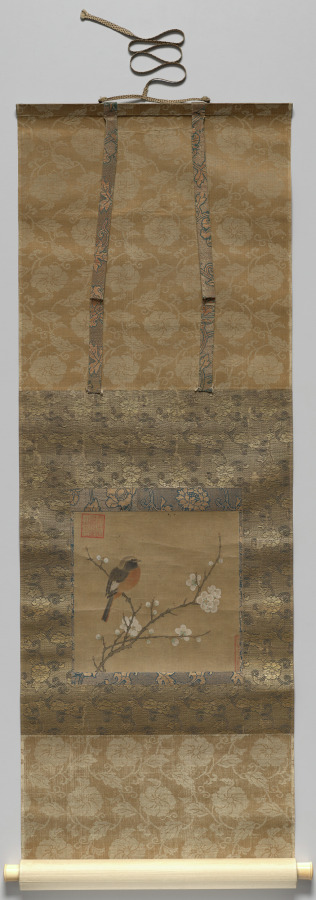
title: Bird on a Flowering Branch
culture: China, Southern Song dynasty (1127–1279)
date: 1100s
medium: album leaf mounted as a hanging scroll; ink and color on silk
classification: Painting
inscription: 2 seals: 1 official seal of the Yuan Dynasty; 1 unidentified partial seal.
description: A male redstart sits hunched on the branch of a flowering plum tree in early spring. The bird’s plumage is rendered in fine detail with a great naturalistic sense, characteristic of Southern Song court painting. While redstarts tend to spend the winter in warmer climates, they may have been seen during the mild winters in China’s southeast in Hangzhou, the seat of the former imperial painting academy where this album leaf was presumably produced. The small square painting must have once been part of an album. When collected in Japan, it was mounted as a hanging scroll, presumably to fit it in an alcove to be enjoyed during the tea ceremony.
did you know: The seal at the upper left is an official Yuan dynasty seal used on paintings and calligraphy in the imperial collection.